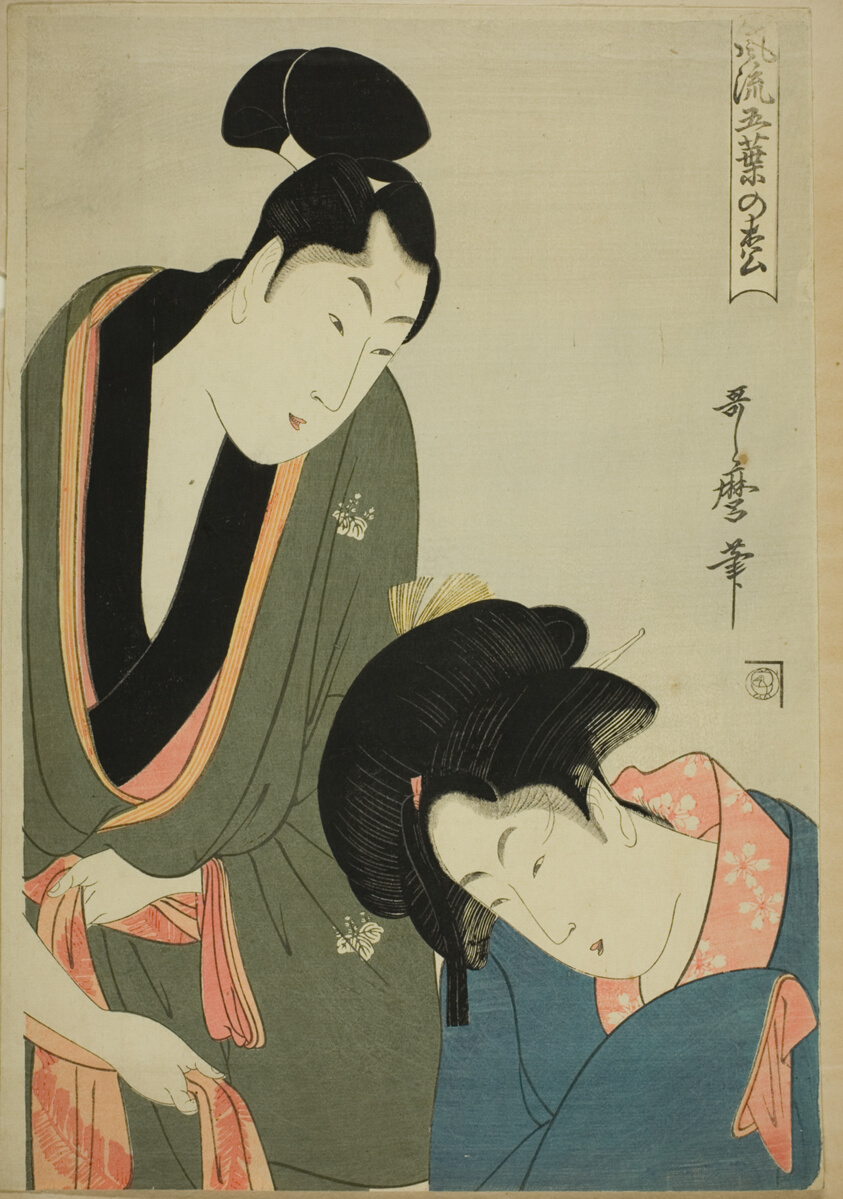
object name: Print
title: Lovers Parting in the Morning, from the series "Elegant Five-needled Pine (Furyu goyo no matsu)"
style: Japanese (culture or style), edo (japanese period), Japanism, East Asian, asian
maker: Kitagawa Utamaro 喜多川 歌麿; Japanese, 1753 (?)-1806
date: c. 1797/98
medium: Color woodblock print; oban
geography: Japan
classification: woodblock print; print; asian art